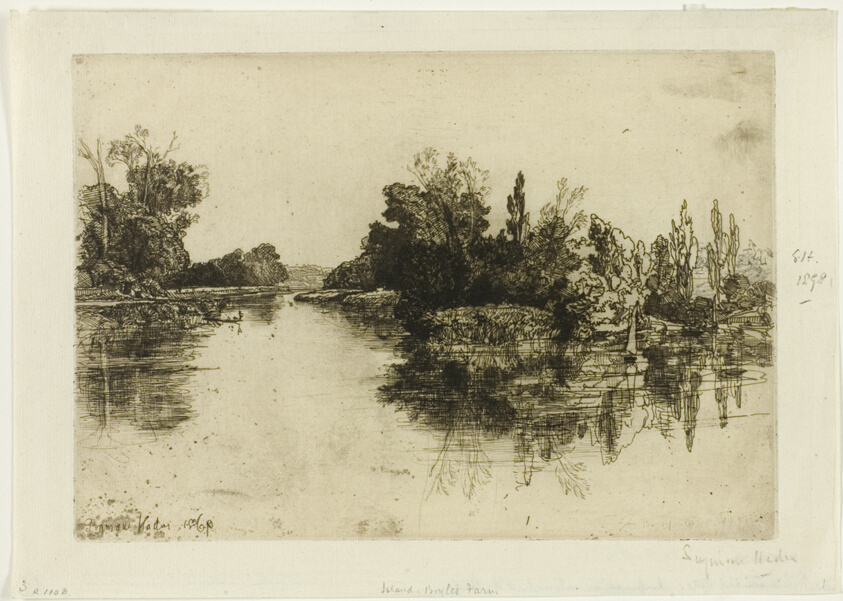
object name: Print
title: The Island, Boyles's Farm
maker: Francis Seymour Haden (English, 1818-1910)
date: 1869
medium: Etching with drypoint on copper printed on ivory laid paper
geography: England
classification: etching; print; prints and drawing